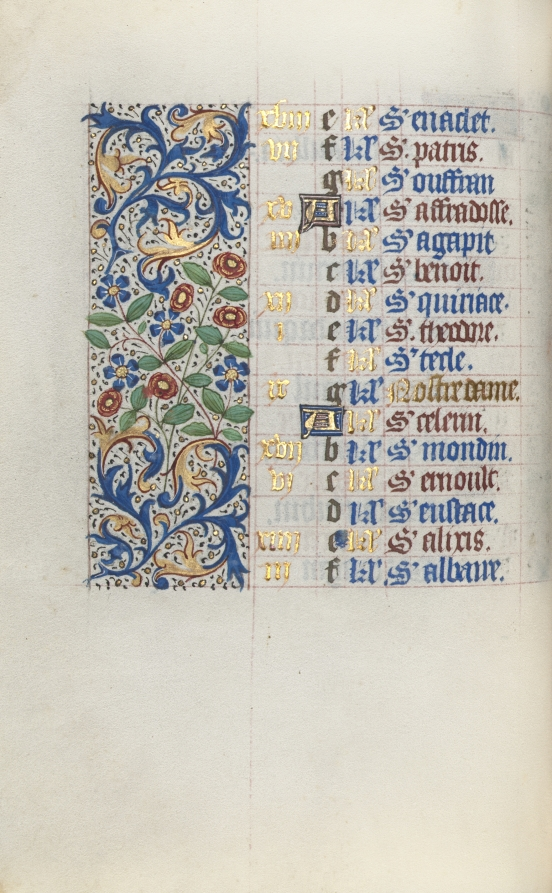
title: Book of Hours (Use of Rouen): fol. 3v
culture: France, Rouen, 15th century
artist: Master of the Geneva Latini (French, active Rouen, 1460–80)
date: c. 1470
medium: ink, tempera, and gold on vellum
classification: Bound Volume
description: In the late 1400s and early 1500s Rouen was an established and important center of book production. The city’s cathedral had a wealthy chapter that spent large sums of money to commission books and to maintain its extensive library. The stationers and booksellers would have likely been concentrated in or near the cathedral precinct. This artist, named after a manuscript now in Geneva, was Rouen’s principal illuminator during the second half of the 1400s.